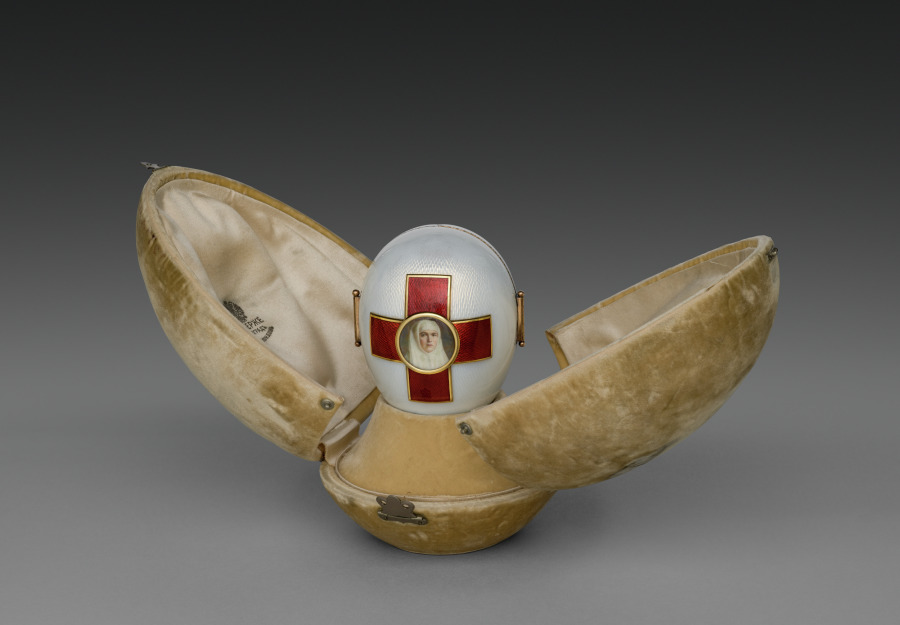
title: Imperial Red Cross Easter Egg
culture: Russia, St. Petersburg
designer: Peter Carl Fabergé (Russian, 1846–1920)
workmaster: Henrik Wigström (Russian, 1862–1923)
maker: House of Fabergé (Russian, 1842–1918)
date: 1915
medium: gold, silver gilt, enamel, glass, ivory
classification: Miscellaneous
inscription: inscribed on interior of egg: symbols for Alpha and Omega and imperial crown for Alexandra Feodorovna; 1915; inscriptions in Cyrillic, Old Church Slavonic, and Roman letters which identify Sts. Olga and Tatiana and presumably describe the central scene of the triptych.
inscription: Inscribed on silk velvet and satin lined case: double-headed eagle, Fabergé, Petersburg, Moscow, London (all in Cyrillic on lining of case); 17.559, abbreviation for "Red Cross" (in Cyrillic in red ink on outside of case).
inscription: Hallmarks: 72, Kokoshnik, lower case alpha in script [assay mark of St. Petersburg, 1908-26]; H.W. [initials of workmaster Henrik Wigström]; Fabergé (in Cyrillic).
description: The House of Fabergé made two imperial Easter eggs in 1915 that honored the contributions of Tsarina Alexandra and her two eldest daughters, Olga and Tatiana, to the war effort as Red Cross Sisters of Mercy. Compared to other Fabergé eggs elaborately ornamented with jewels, the eggs reflected the mood of austerity in Russia during World War I. This version becomes an icon when opened, revealing miniatures of the patron saints of the tsarina’s daughters. After the Russian Revolution, this relic of the Tsarist past was sold by the Soviet government to raise needed cash for the treasury.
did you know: This egg was confiscated by the Bolsheviks during the Russian Revolution and sold by the government of Josef Stalin in the 1930s to raise money for the Soviet treasury.